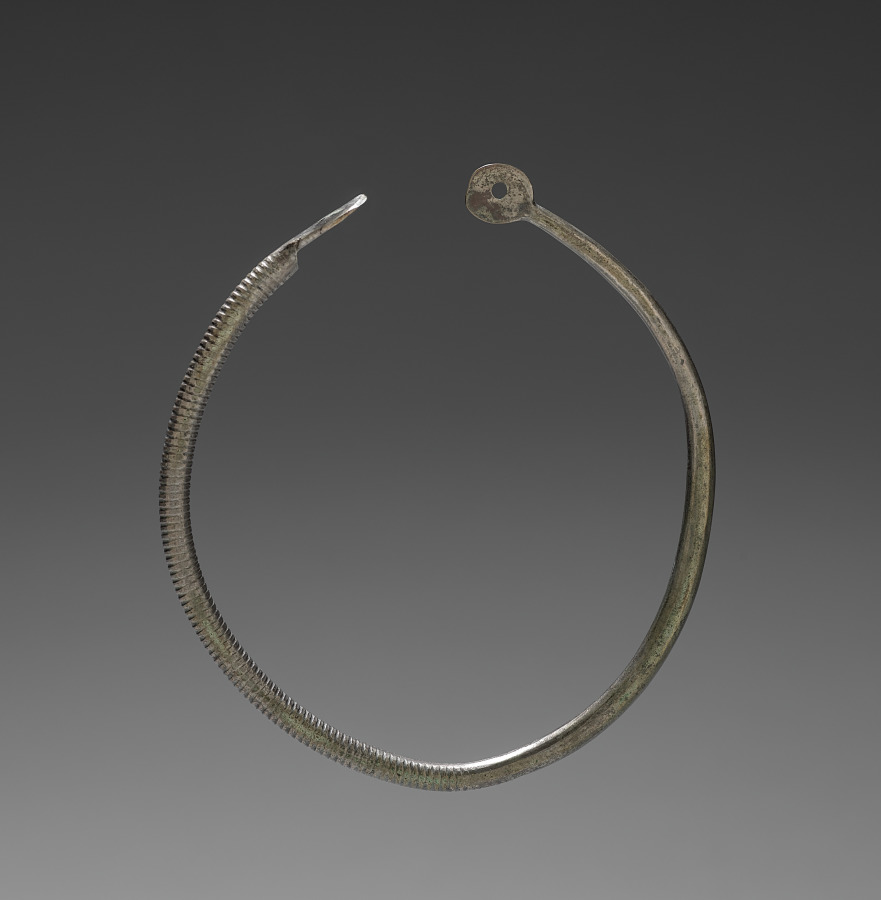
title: Nose Ring (?)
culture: India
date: 1800s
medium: silver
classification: Jewelry